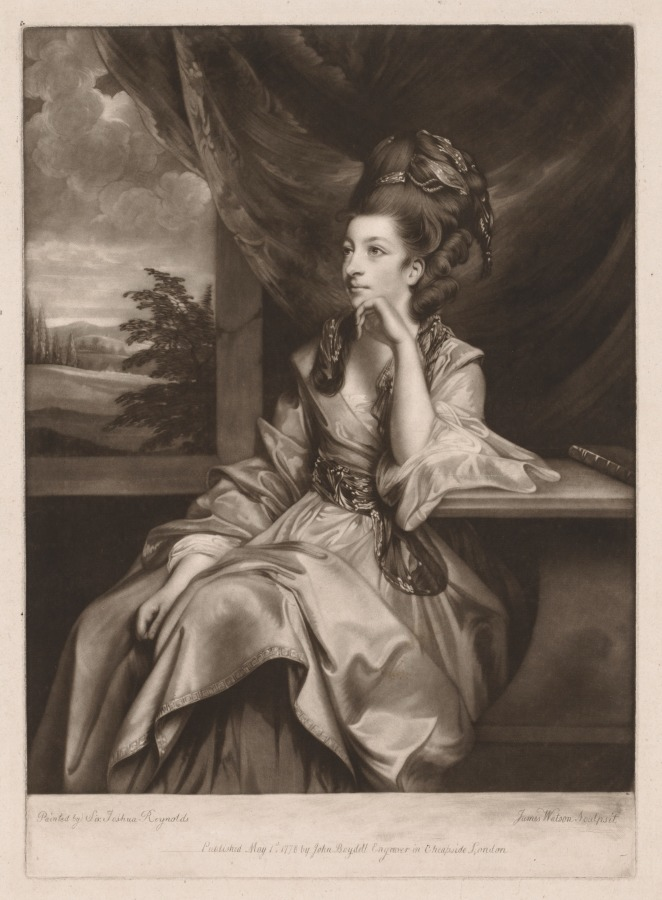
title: Catherine Bunbury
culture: England, 18th century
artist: James Watson (British, 1740–1790)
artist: after Joshua Reynolds (British, 1723–1792)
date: 1778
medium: mezzotint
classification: Print